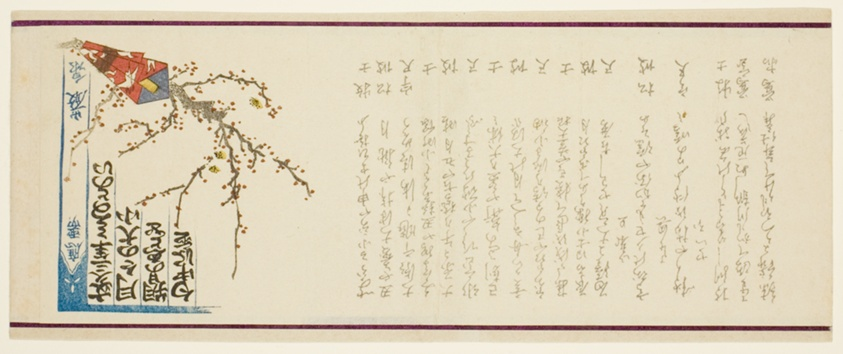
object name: Print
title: New Year Gift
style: Japanese (culture or style)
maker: Kamata Gensen (Japanese, 1844-?)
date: 1863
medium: Color woodblock print; surimono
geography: Japan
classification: woodblock print; print; asian art